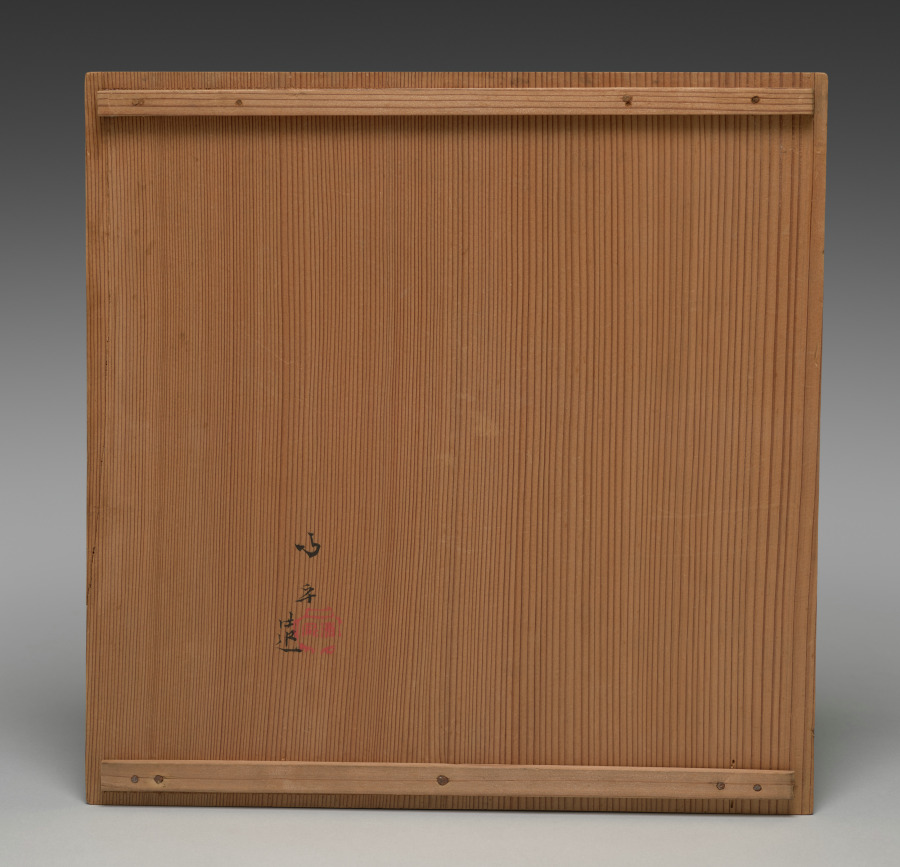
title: Covered Bowl with Seven Treasures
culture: Japan, Edo period (1615–1868)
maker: Seifū Yohei II (Japanese, 1844–1878)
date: 1861–78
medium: Stoneware with overglaze color enamel and gold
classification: Ceramic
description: The box lid for this large covered bowl by Yohei II identifies it as in the style of Ninsei, a reference to Nonomura Ninsei. Overglaze enamels in red, green, and white sit within lattices of jewel-shaped gold forms scattered across the lid and base in a design known as the seven treasures. At the center of the lid is a knob in the shape of a peach with a stem and leaves. A prominent feature of the piece is the appearance of warm pink dots known as gohon. Here creamy at their center and with a gradation to almost red at the edges, they appear during firing due to high iron content in the clay. Pieces with this effect were made in emulation of certain ash-glazed ceramics imported from Korea. The originals were made to order for the Japanese market at a kiln in Busan. The kiln was established within the Japanese diplomatic compound in that port city by the lord of Tsushima in 1639 and continued production until 1717. In the 17th century, teabowls from Korea in a variety of styles were extremely popular among practitioners of Japanese-style tea, and they were soon copied by ceramists active on the archipelago, including in Kyoto.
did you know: The peach's leaf veins are detailed in gold.